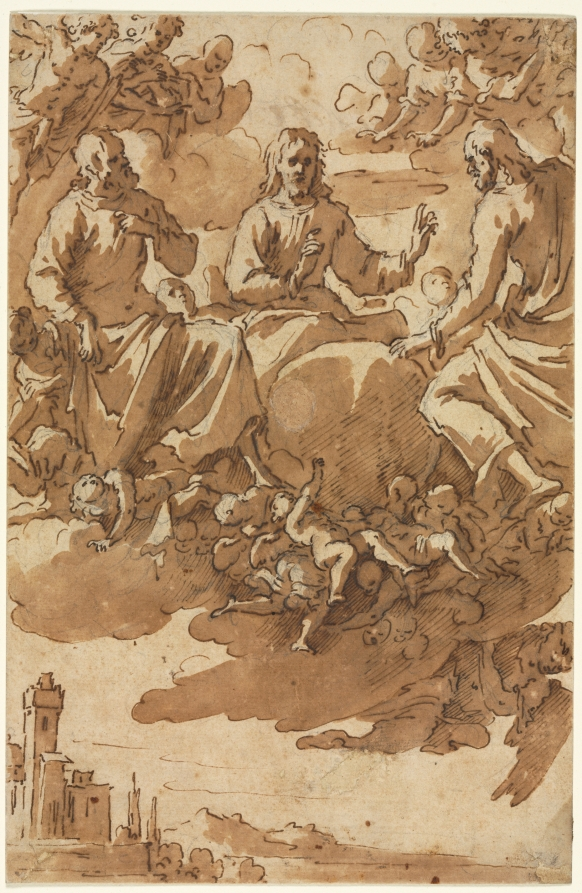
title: Christ in Glory with Two Saints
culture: Italy, 17th century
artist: Marcantonio Bassetti (Italian, 1586–1630)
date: first third 17th century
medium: pen and brown ink and brush and brown wash with graphite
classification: Drawing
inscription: VERSO OF SECONDARY SUPPORT, upper left, in graphite: 10°° ; upper center, in graphite: 66 [circled, crossed out in blue pencil ; upper right, in blue pencil: #44 ; center, in graphite: [Urr?] / [Vach?] [underlined] 826 / [120 x ?] / Palma Giovane [underlined] / 1544-1628 [crossed out]; lower left, in graphite 87/14 [crossed out] ; lower center, in graphite: 10/24/57 / See Albertina Cat. / #208. (p. 105) ; lower right, in graphite: 709 [crossed out]